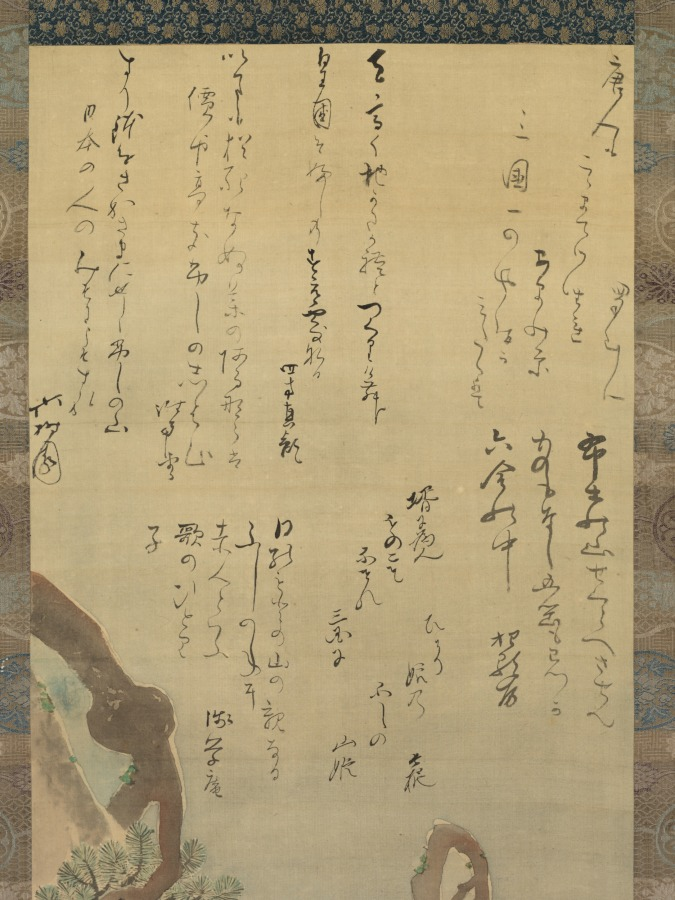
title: Mt. Fuji through Pines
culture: Japan, Edo period (1615–1868)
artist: Kubo Shunman (Japanese, 1757–1820)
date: late 1700s-early 1800s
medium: hanging scroll, ink and color on silk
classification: Painting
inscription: Signed: painted by Shunman and others (Shunman narabi utsu [su]) Sealed: Shunman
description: Kubo Shunman dashed off this loose image of Mt. Fuji viewed in the distance from behind pine trees as a performance painting, or sekiga. He did it on the spot in the company of members of his poetry club. Six of them, including the club's founder Yadoya no Meshimori (Rokujuen, 1753–1830), added kyoka poems, 31-syllable poems like the classical Japanese waka poem in form, but with a heavy emphasis on humor. Shunman jotted down a poem as well, in the bottom right corner of the painting, before signing and sealing it. Each poem takes the painted image as its point of departure.